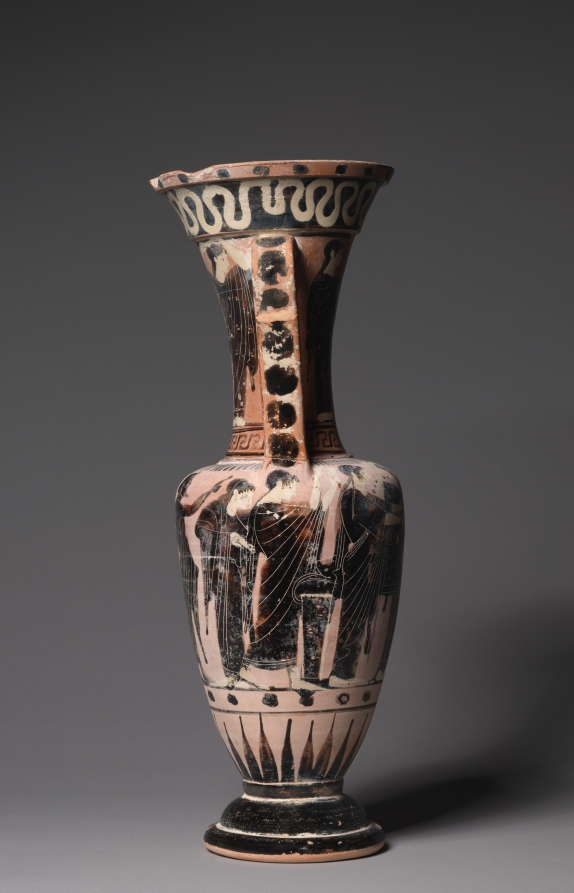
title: Black-Figure Loutrophoros-Amphora (Ritual Water Vessel): Prothesis (Laying out of Corpse), Mourners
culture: Greek, Attic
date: c. 500 BCE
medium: ceramic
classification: Ceramic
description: The loutrophoros, a tall-necked water vessel, served two main purposes in ancient Athens. In life, it carried sacred spring water for ceremonial pre-marriage baths. After death, it marked the tomb of an unmarried person, as if to account for that not experienced in life. Often, as here, it has no bottom, permitting offerings to flow through to the grave. Both the precise shape of this vase—a two-handled loutrophoros-amphora rather than a three-handled loutrophoros-hydria—and its depiction of the deceased suggest the commemoration of a departed man (rather than a woman). The iconography is entirely funerary, with multiple mourning figures shown: four women on the neck; six women surrounding the corpse on its bier; and three men making farewell gestures. The inscriptions near some of the mourning women do not spell out real words but may represent their sorrowful cries.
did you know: Mourning figures wrap all the way around this vessel, even beneath the handles.